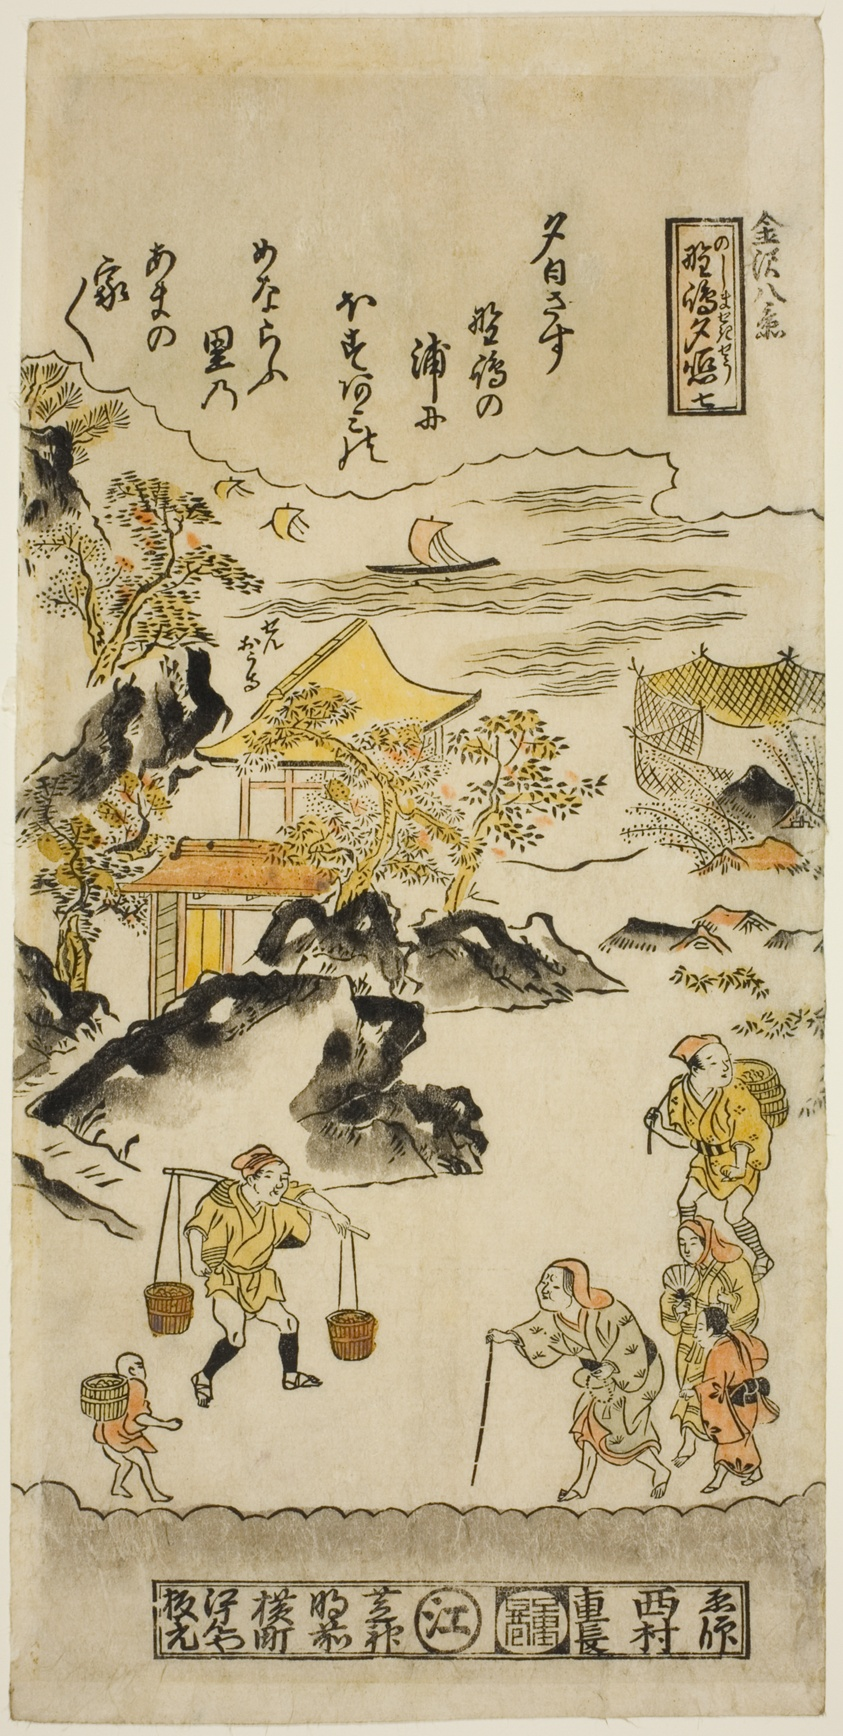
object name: Print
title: Evening Glow at Nojima (Nojima no sekisho), No. 7 from the series "Eight Views of Kanazawa (Kanazawa hakkei)"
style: Japanese (culture or style)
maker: Nishimura Shigenaga (Japanese, 1697 (?)-1756)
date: c. 1716/36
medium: Hand-colored woodblock print; hosoban, urushi-e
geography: Japan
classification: woodblock print; print; asian art